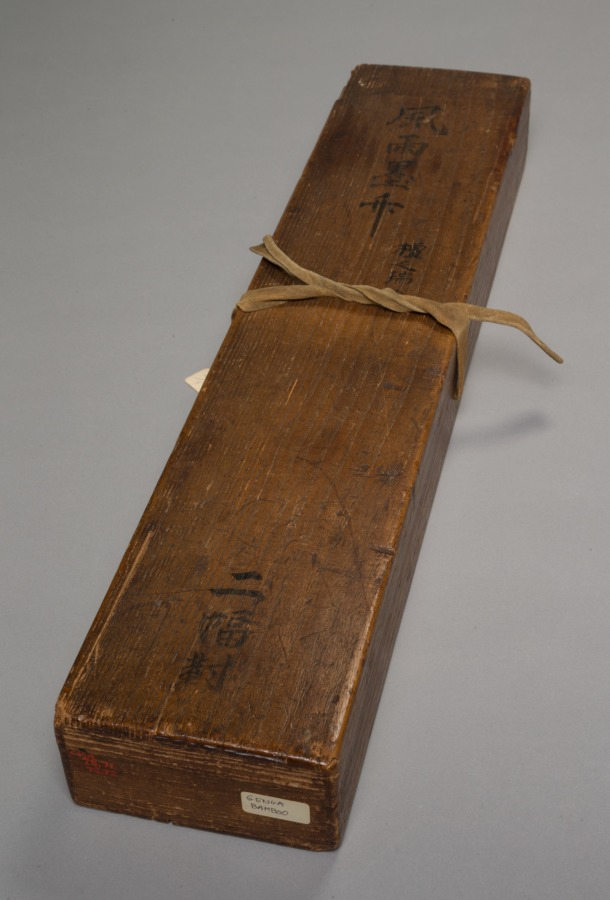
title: Bamboo in Rain; Bamboo in Wind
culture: Japan, Muromachi period (1392–1573)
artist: Genga (Japanese)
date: early 1500s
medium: hanging scroll; ink on silk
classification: Painting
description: East Asian paintings from China, Korea, and Japan were frequently conceived as sets of multiple images. These sets might have been composed for specific palace or temple rooms, or to portray a specific theme, such as the four seasons. Over time, the original intent of such sets is often lost through damage, changes in ownership, or a variety of other reasons. The identity of the artist can also be lost, but then, sometimes, retrieved. This pair of ink paintings has traditionally been labeled as Japanese and attributed to the 16th-century painter Genga. Since there are no seals or signature of the artist on the painting, this attribution was based on comparisons of brush style with paintings known to be by Genga. More recent study indicates that while the 16th century is an appropriate time frame for the pair, the precise cultural identity of the artist is not certain after all. The dark, eccentric shapes of the rocks and bamboo clusters and the dramatic tonal contrasts evident throughout the composition point to either Korean authorship or influence upon a Japanese painter of the period.